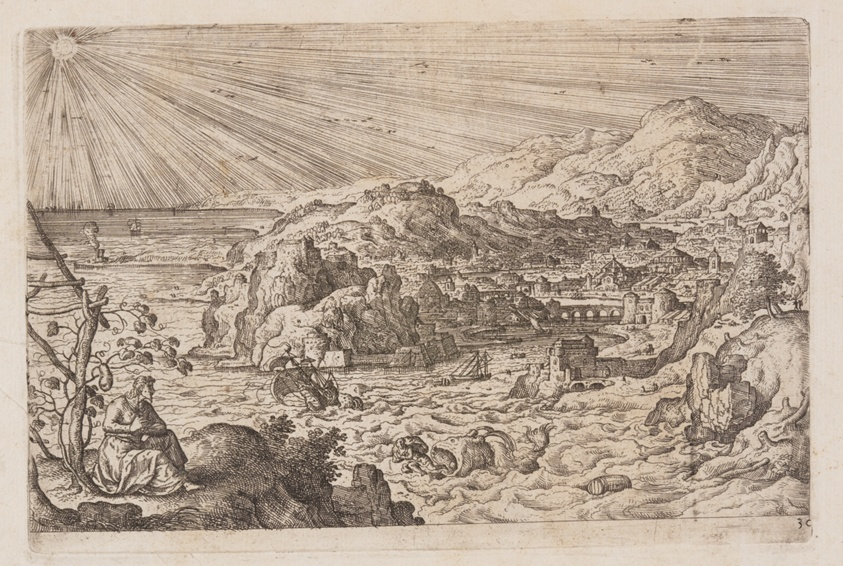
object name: Print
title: Plate 30, from Landscapes with Scenes from the Old and New Testament and Ovid’s Metamorphoses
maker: Hans Bol (Flemish, 1534–1593); published by Philip Galle (Flemish, 1537–1612)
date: 1574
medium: Etching on ivory laid paper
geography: Flanders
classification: print; paper; prints and drawing; etching